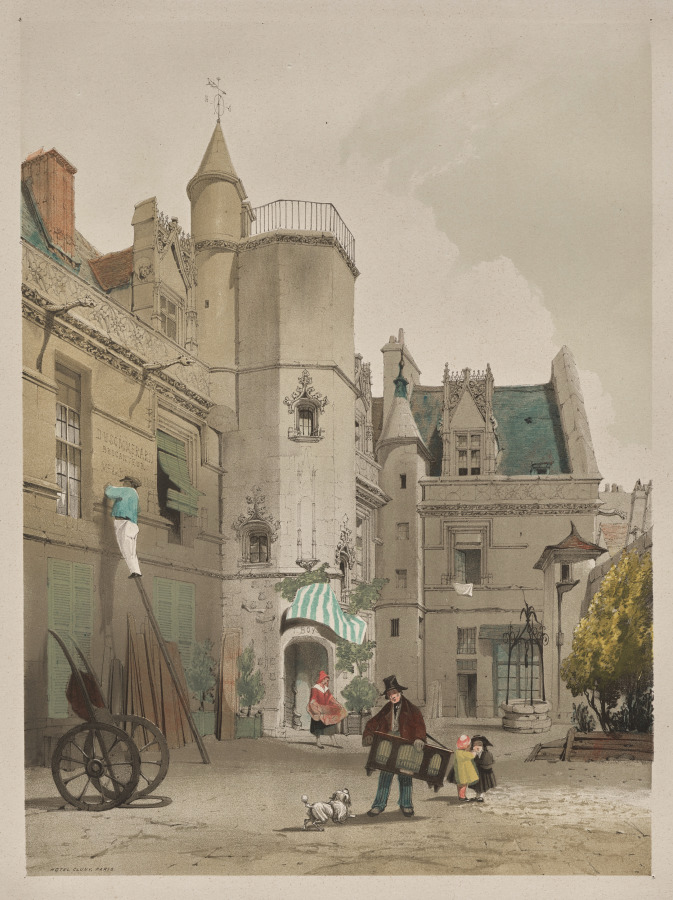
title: Picturesque Architecture in Paris, Ghent, Antwerp, Rouen: Hôtel Cluny, Paris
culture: England, 19th century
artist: Thomas Shotter Boys (British, 1803–1874)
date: 1839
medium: lithograph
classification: Portfolio